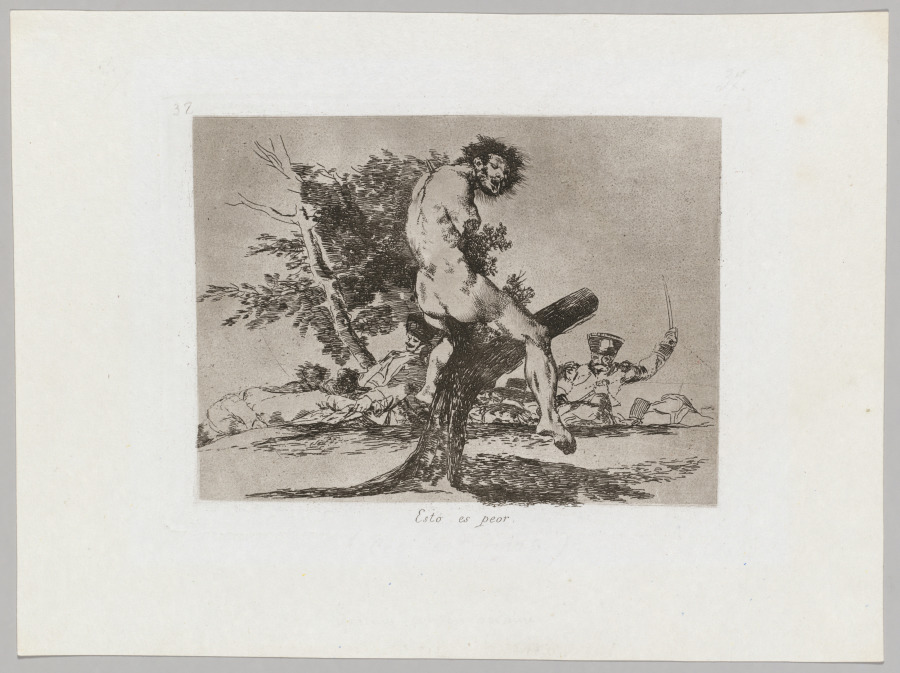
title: Disasters of War: Pl. 37, This is worse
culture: Spain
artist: Francisco de Goya (Spanish, 1746–1828)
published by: Real Academia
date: 1810–1813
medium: Etching and aquatint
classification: Print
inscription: In plate, below image, center: Esto es peor.; in plate, above image, upper left: 37; above upper right platemark: 37. erased graphite